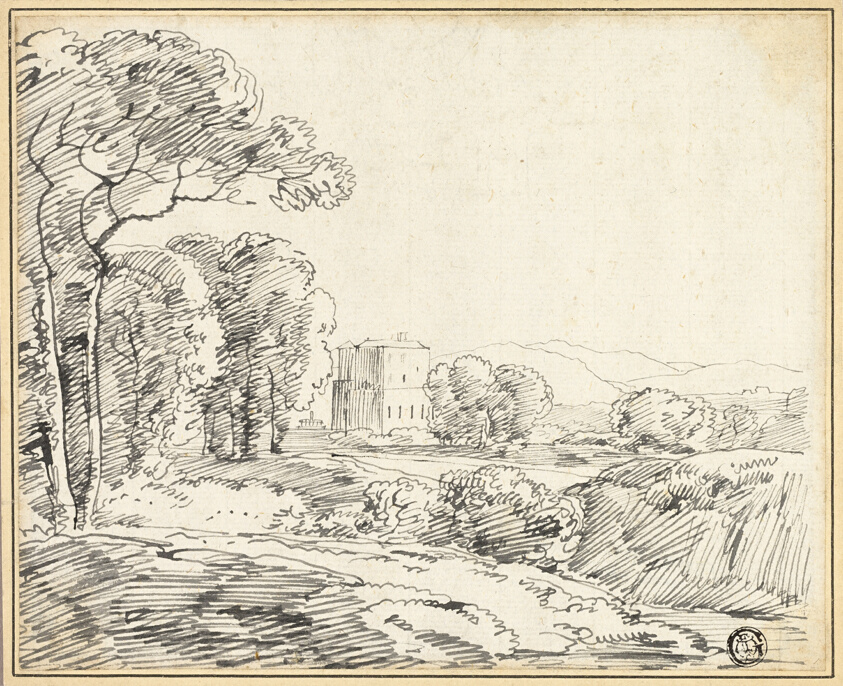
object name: Drawing and Watercolor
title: Landscape, House in Park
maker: Franz Kobell (German, 1749-1822)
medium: Pen and black ink on ivory laid paper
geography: Germany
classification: pen and ink drawings; drawings (visual works); prints and drawing